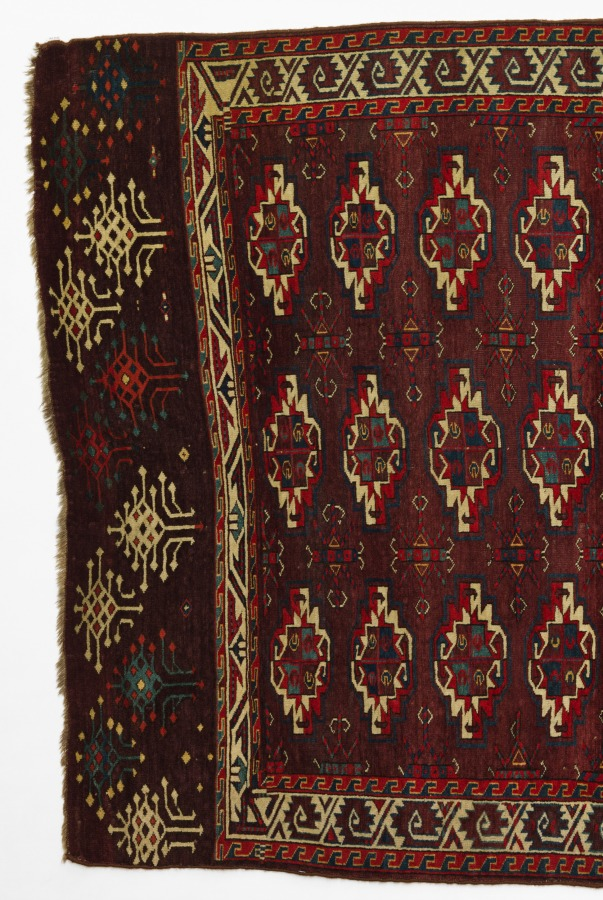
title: Turkmen Main Carpet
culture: Turkmenistan, Yomud tribe, 19th century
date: mid-1850s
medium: Wool, knotted pile, 128-136 symmetrical knots per square inch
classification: Carpet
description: In the Islamic world, carpets symbolize status and wealth. A carpet’s origin can be identified by its design, color, and technique. Shades of red and lobed motifs, or guls, are hallmarks of Turkmen carpets woven by nomadic tribes across northeast Iran, Afghanistan, and central Asia. This main carpet of the Yomud tribe features beautiful colors in the guls on a rich aubergine ground; the decorated skirts, or elem, with stylized flora at each end, are its rarest feature. This carpet would have been the prized possession within the living quarters of a round tent, or yurt.